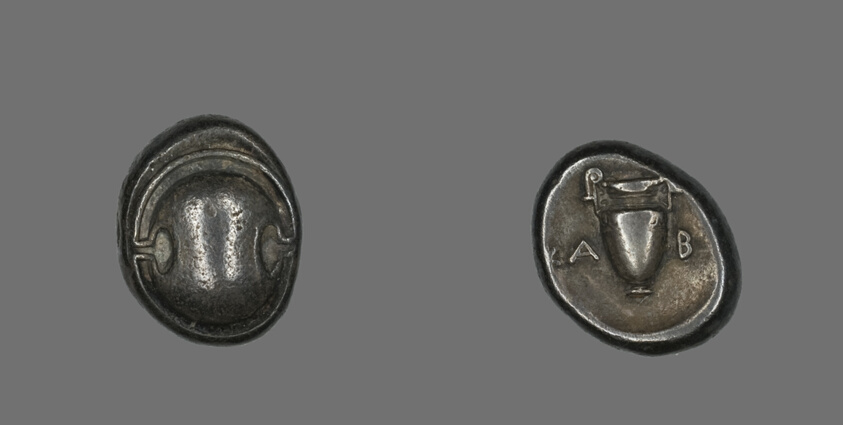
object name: Coin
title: Drachm (Coin) Depicting a Shield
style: greek, ancient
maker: Greek; minted in Thebes, Boeotia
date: 5th-4th century BCE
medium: Silver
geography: Thívai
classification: coin; ancient art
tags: shields, vessels